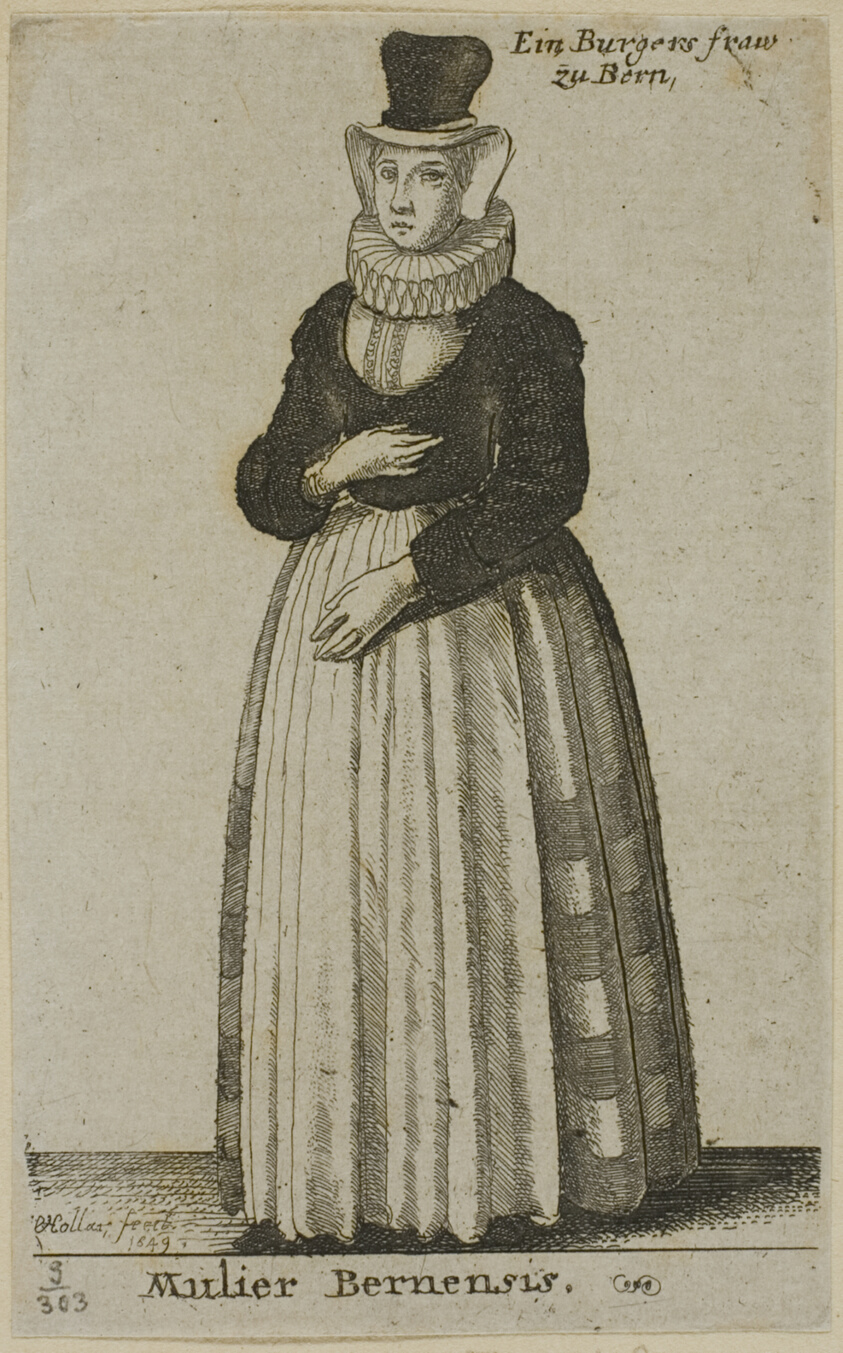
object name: Print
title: Woman of Bern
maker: Wenceslaus Hollar (Bohemian, 1607-1677)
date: 1649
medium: Etching on gray China paper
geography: Bohemia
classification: etching; print; prints and drawing